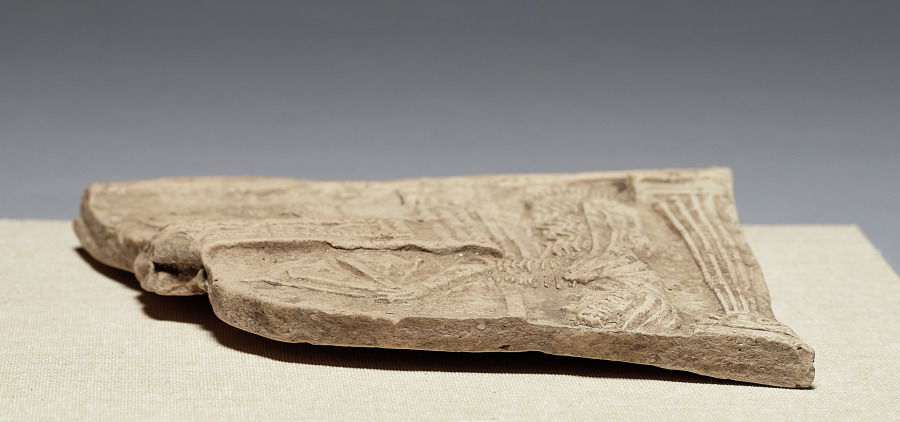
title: Votive Plaque (Pinax) with Persephone Making her Bridal Bed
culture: West Greek/South Italian, Classical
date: c. 490–450 BCE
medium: Terracotta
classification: Plaque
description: Probably once brightly painted, this relief plaque belongs to a series of votive dedications made in Locri Epizephirii, near the “toe” of Italy, to the goddess Persephone (or Kore), daughter of Demeter. Following her abduction by Hades, god of the Underworld, Persephone regularly returned to earth, dictating the seasons and making agriculture possible. Often, as here, the plaques show domestic scenes.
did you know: The rooster often appears with Persephone on such plaques, perhaps because both mark transitions.